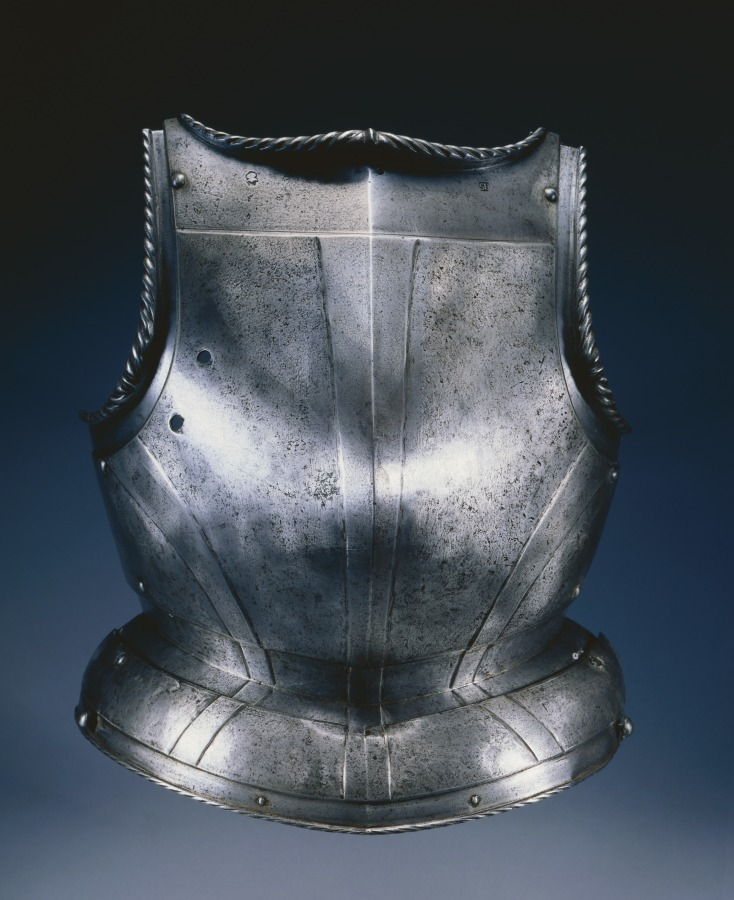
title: Breast and Backplate from an Armor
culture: Germany, Landshut, mid-16th century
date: mid-1500s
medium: steel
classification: Arms and Armor